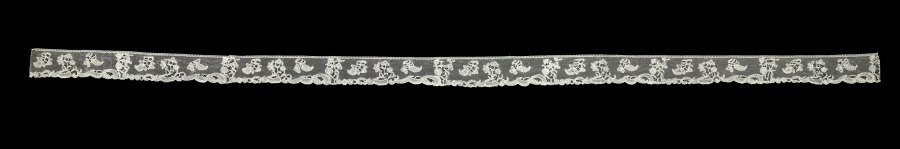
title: Lace Edging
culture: Belgium, Brussels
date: 1700s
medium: Linen: bobbin lace (Point d'Angleterre)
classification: Lace